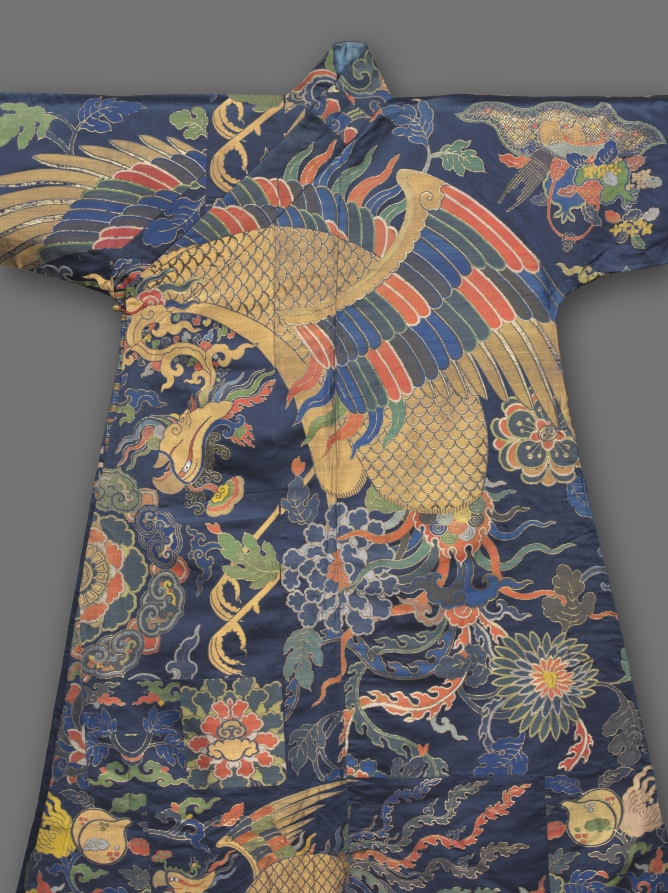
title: Tibetan Man's Robe, Chuba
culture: China, Qing dynasty (1644-1911), Kangxi period (1662-1772)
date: late 1600s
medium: Silk, gilt-metal thread of two kinds: satin weave with supplementary weft patterning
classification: Garment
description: This magnificent robe for a Tibetan lama or an aristocrat was originally a Chinese imperial wall hanging. Tibetan tailors cut it into 60 separate units, reassembling the fabric for a completely new and bold design. The wearer of such a garment must have impressed bystanders by his striking appearance. What you see here is the robe’s back side. Textiles played an important role in Chinese diplomacy with foreign governments. Diplomatic gifts of silk served to pacify border populations and to maintain balanced power relationships. Over centuries the Chinese court endeavored to keep a stable relationship with powerful Tibetan Buddhists. During the Qing dynasty (1644–1911) the Chinese court began to send gifts of court garments and furnishings to Tibet where they were altered to create Tibetan-style robes.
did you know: Large, splendid gold-thread phoenixes have pride of place on the front and back of the robe, complemented by two smaller but equally resplendent phoenixes below.